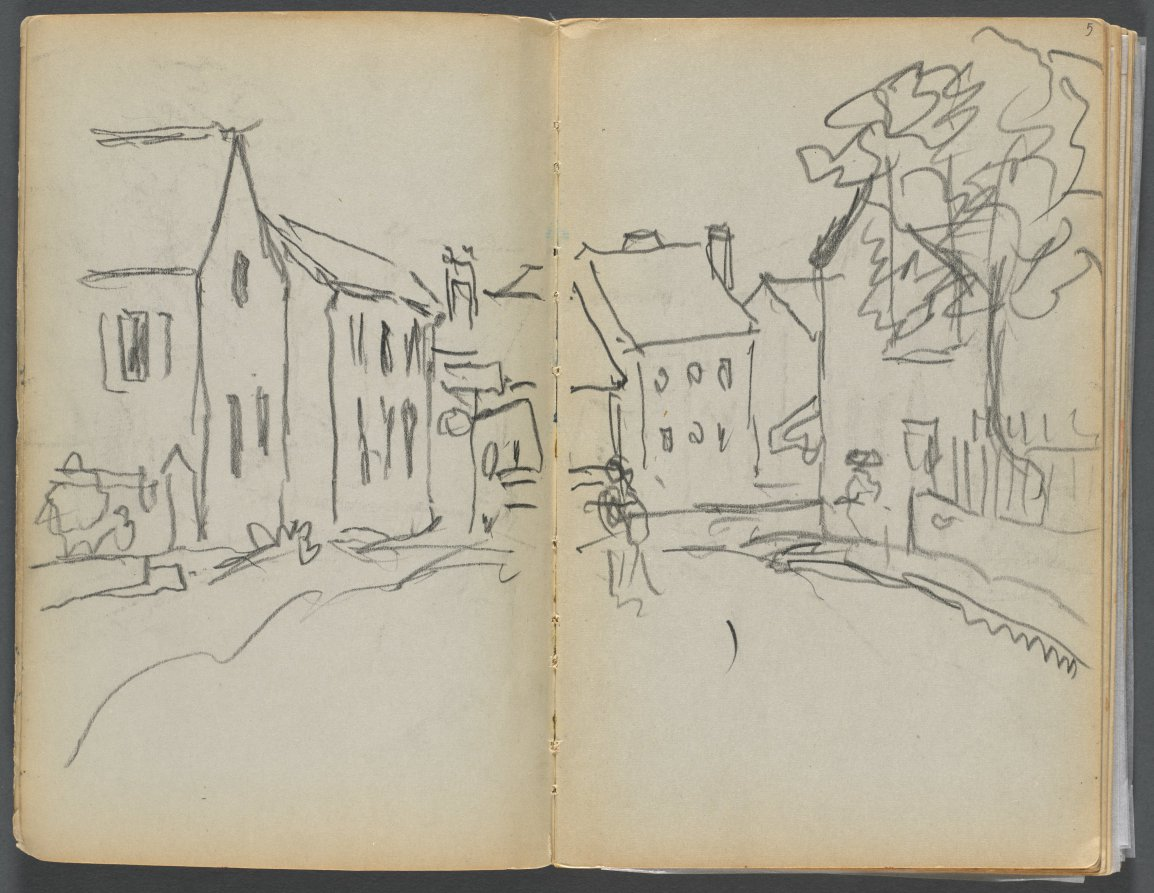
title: Sketchbook- The Granite Shore Hotel, Rockport, page 004 & 5: Street Scene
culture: America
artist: Maurice Prendergast (American, born Newfoundland [now Canada], 1858–1924)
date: 1905–10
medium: graphite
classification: Bound Volume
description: This sketchbook contains 72 pages of pencil drawings and 9 watercolors of Cape Ann. On the inside of the cover Prendergast wrote the address of the Granite Shore Hotel in Rockport, Massachusetts.